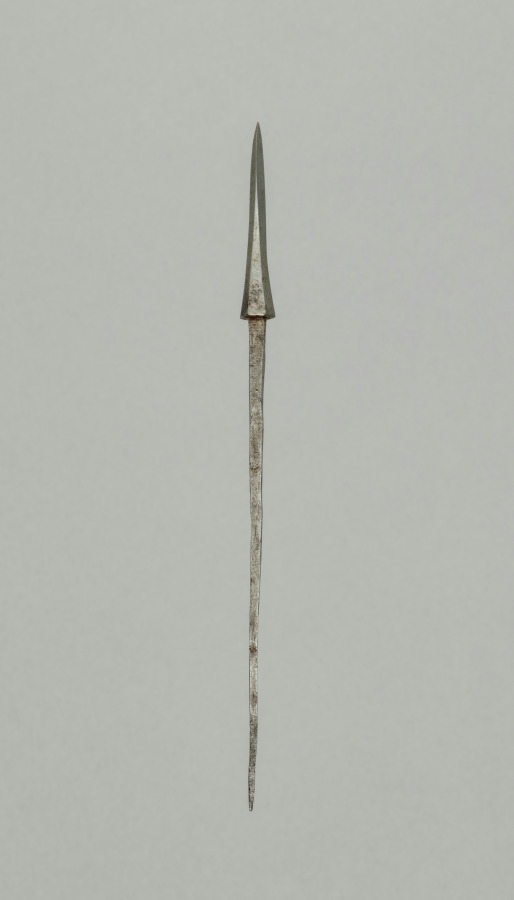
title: Arrow Point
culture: Japan, Edo period (1615–1868)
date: 1700s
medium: steel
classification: Arms and Armor